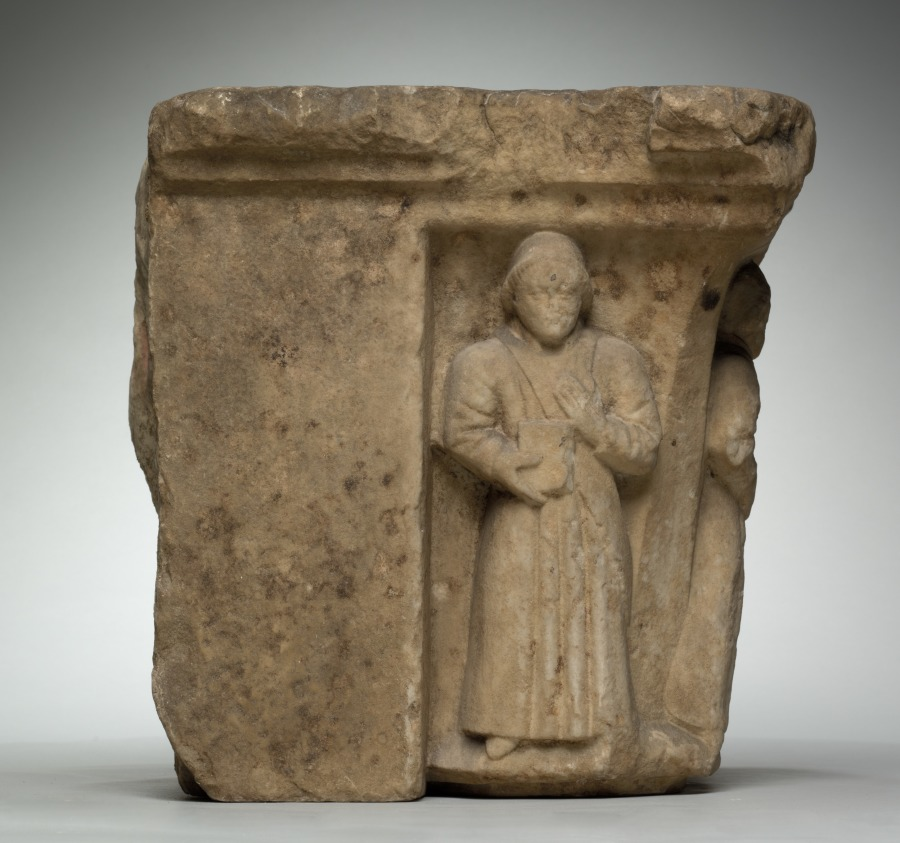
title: Engaged Capital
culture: Southern France, Abbey of Larreule, near Tarbes, 15th century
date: 1400s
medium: limestone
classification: Sculpture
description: This capital belongs to a surviving group including other architectural fragments that once decorated the cloister of the Abbey of Larreule. A cloister was a covered walkway or arcade, usually around all four sides of a square area of grass (the "cloister garth"). The seclusion of the cloister was the monks’ exclusive domain, off limits to others. Here, the monks were supposed to pray, study, meditate, and exercise in privacy and solitude. Such cloister capitals served both to instruct the monks and as a focus for their devotions. Other capitals in this series are installed in the Jardin Massey at Tarbes, near the original abbey. An arch from Larreule has been assembled with other associated French capitals at The Cloisters in New York.